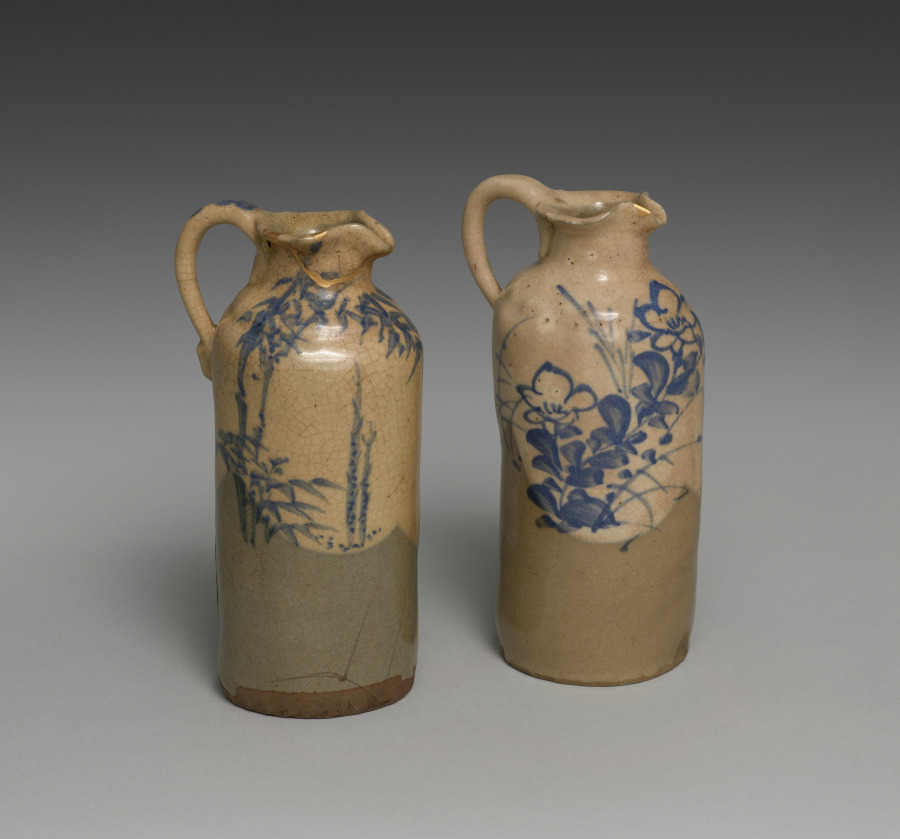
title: Sake Pourers with Bamboo and Bellflowers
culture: Japan, Edo period (1615–1868)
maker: attributed to Seifū Yohei I (Japanese, 1801–1861)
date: c. 1844–57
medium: pair of sake pourers; stoneware with white slip, underglaze blue and gold repair (kintsugi) (Kyoto ware)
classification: Ceramic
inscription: The storage box for the pair of vessels is inscribed and impressed with seals.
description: This pair of sake pourers adorned with with bamboo and bellflowers is attributed to the founder of the Seifū Studio, Seifū Yohei I (1801–1861). Yohei I, the lineage founder, was born to the Yasuda family in the city of Kanazawa, which faces the Sea of Japan. His home province of Kaga (in present-day Ishikawa Prefecture) produced its own ceramics, known as Kutani ware, but for his training as a potter, Yohei I chose Kyoto, which produced the more technically advanced porcelain ware. He moved to Kyoto around the 1820s and became apprenticed to Nin’ami Dohachi, a leading potter in the city. He later struck out on his own, and it is likely that his teacher gave him the name Seifu Yohei. His works include many exquisitely painted copies of Chinese porcelain, and he also produced stoneware with overglaze color enamels that emulated works in the style of Ogata Kenzan (1663–1743) at which his teacher excelled.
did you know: The two pourers are stored together in a bespoke box, which is inscribed and impressed with red seals.